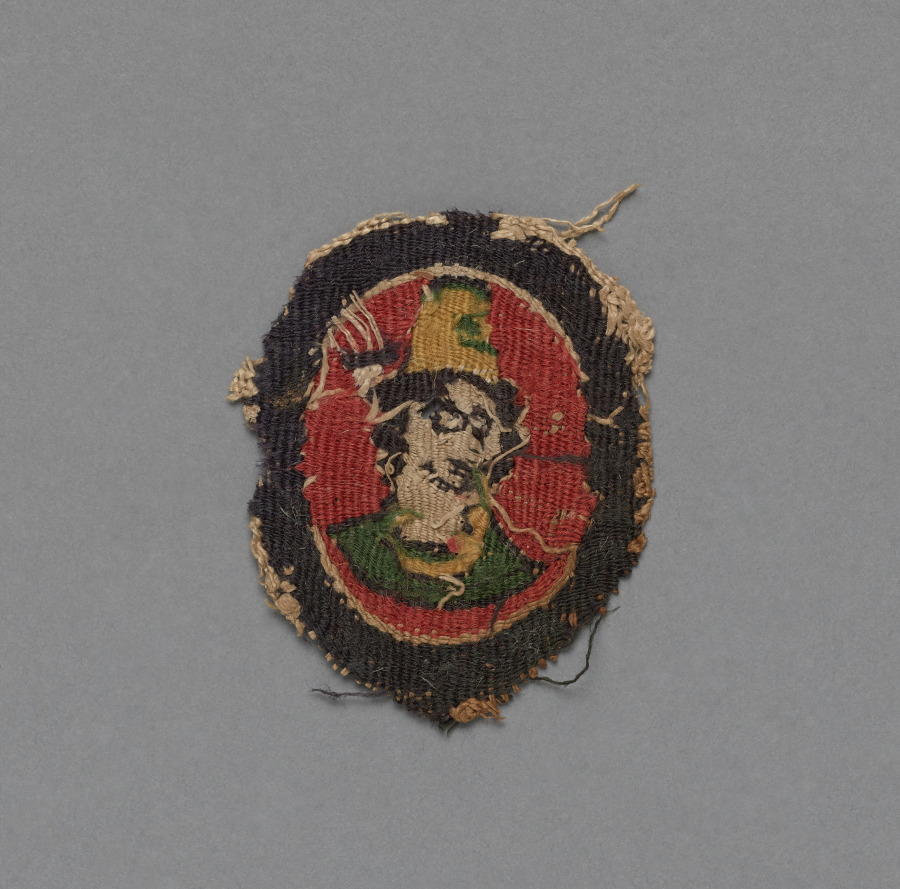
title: Fragment from a Tunic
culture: Egypt, 6th - 16th century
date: 500s - 1500s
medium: tabby weave with inwoven tapestry ornament, linen and wool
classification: Textile